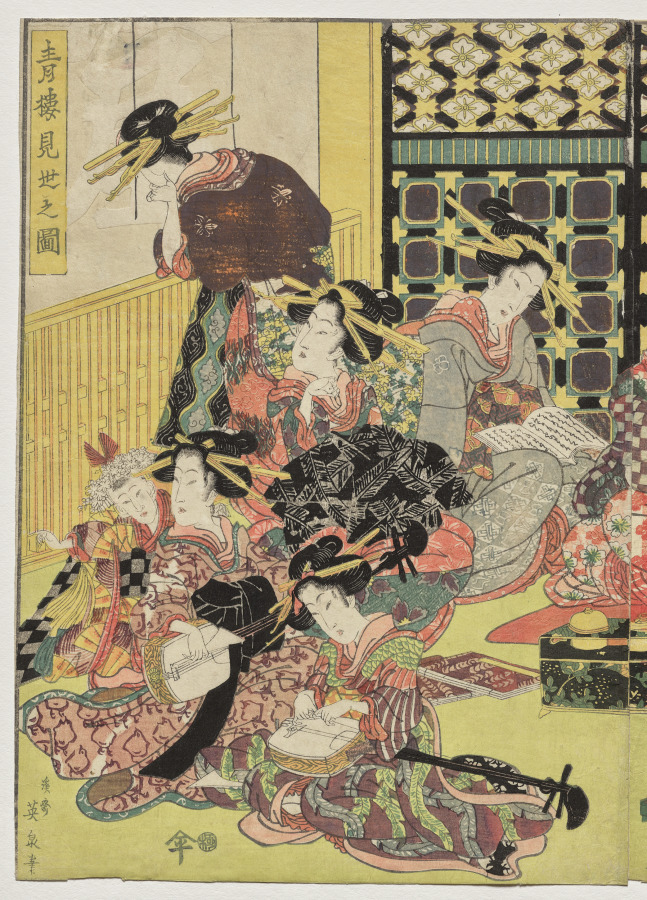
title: A Picture of the Viewing in the Pleasure Quarters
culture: Japan, Edo period (1615–1868)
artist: Kikukawa Eizan (Japanese, 1787–1867)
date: 1810s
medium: color woodblock print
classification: Print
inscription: Signature: Keisai Eisen hitsu Publisher: Omiya Heihachi (Hei) Seal: kiwame